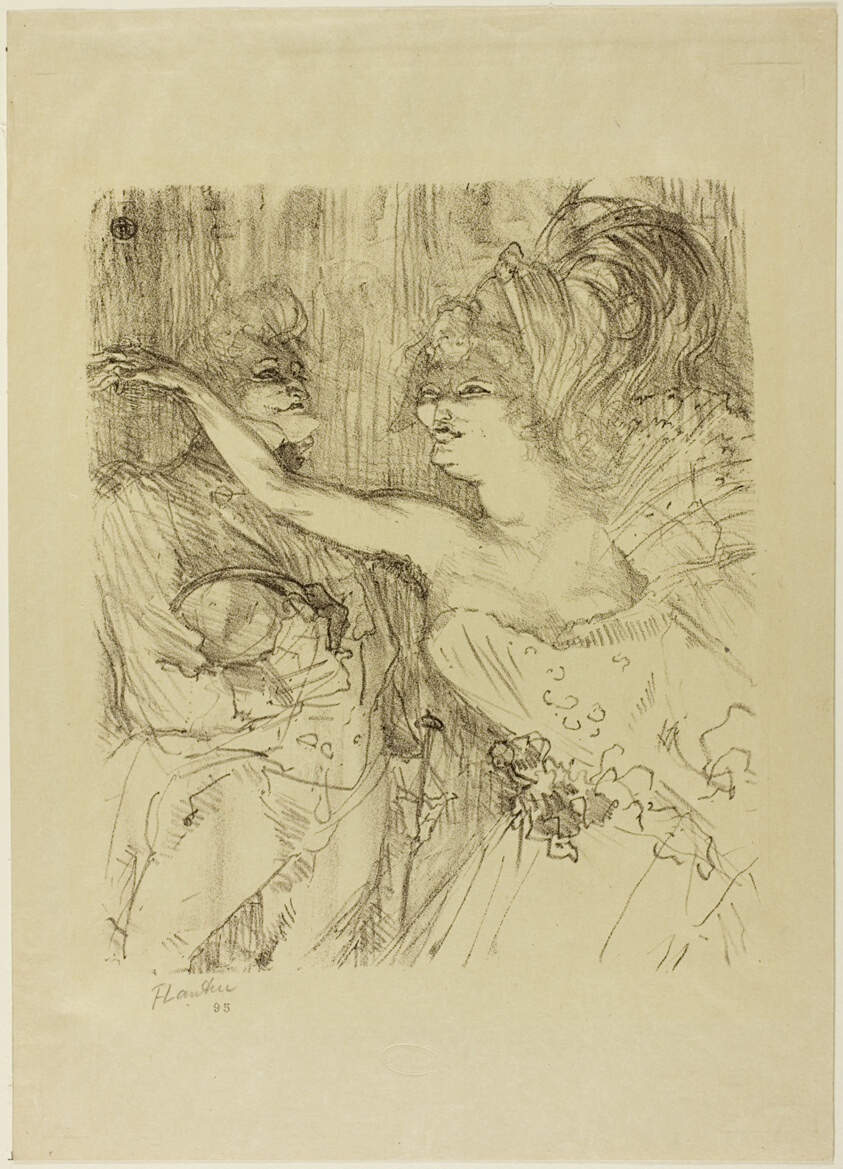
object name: Print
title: Guy and Mealy, in "Paris qui Marche"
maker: Henri de Toulouse-Lautrec (French, 1864-1901)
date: 1898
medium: Color lithograph on cream wove paper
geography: France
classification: lithograph; print; prints and drawing